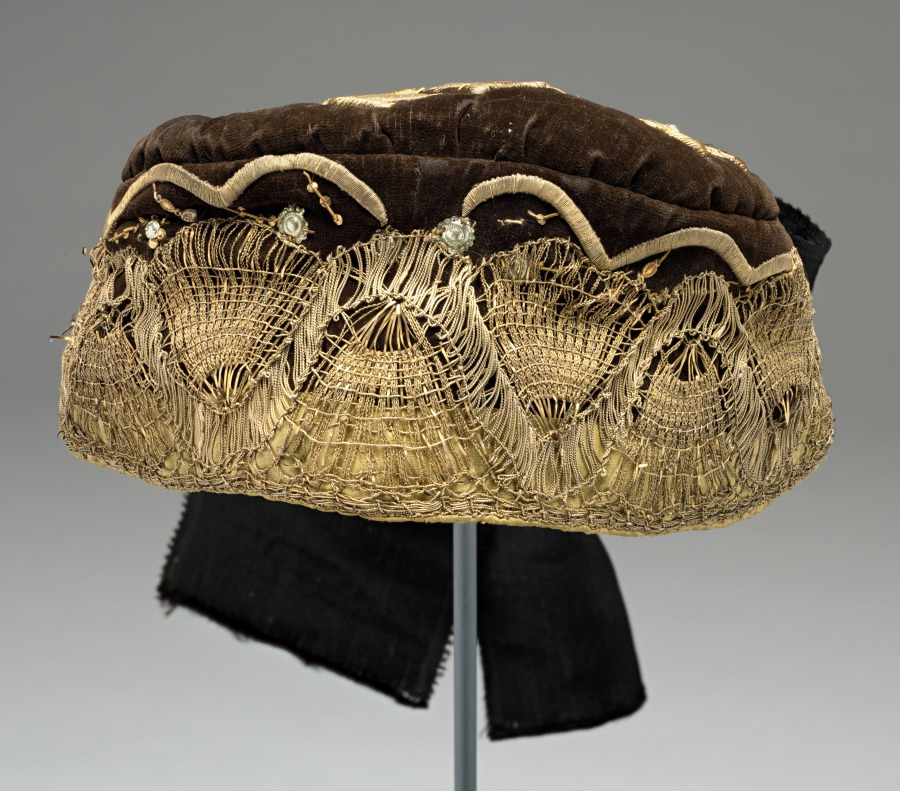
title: Embroidered Headdress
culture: Germany, Schleswig, 18th century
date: 1700s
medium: embroidery, velvet ground embroidered with gold and silver thread; edged with gold lace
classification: Garment